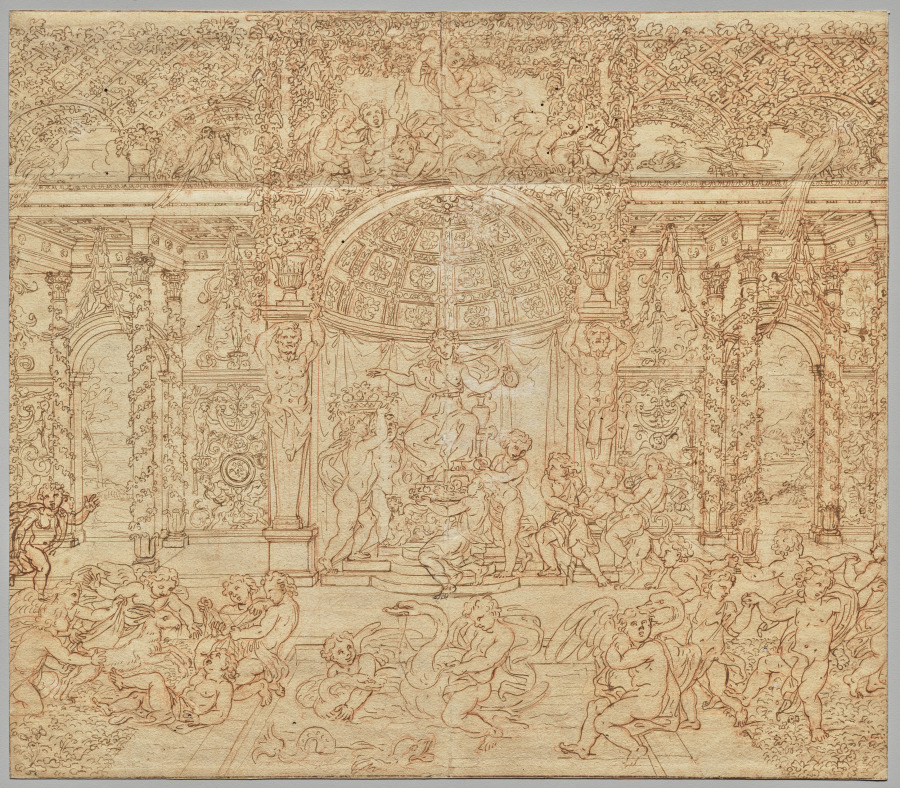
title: Hymn to Venus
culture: France, 18th century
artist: Louis Felix de la Rue (French, 1731–1765)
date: c. 1760–65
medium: Pen and brown ink over red chalk (?) on antique laid paper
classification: Drawing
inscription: verso heavily inscribed in ink and pencil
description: Louis Félix de La Rue came from a family of artists and was best known for creating designs for decorative arts, such as ceramics. This sheet—which features putti and bacchantes, the artist’s preferred subjects—likely served such a purpose, given its allover composition and focus on patterning and symmetry.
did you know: The verso of this drawing is covered in the artist’s calculations and notations, suggesting that he reused a sheet found in his studio to create it.